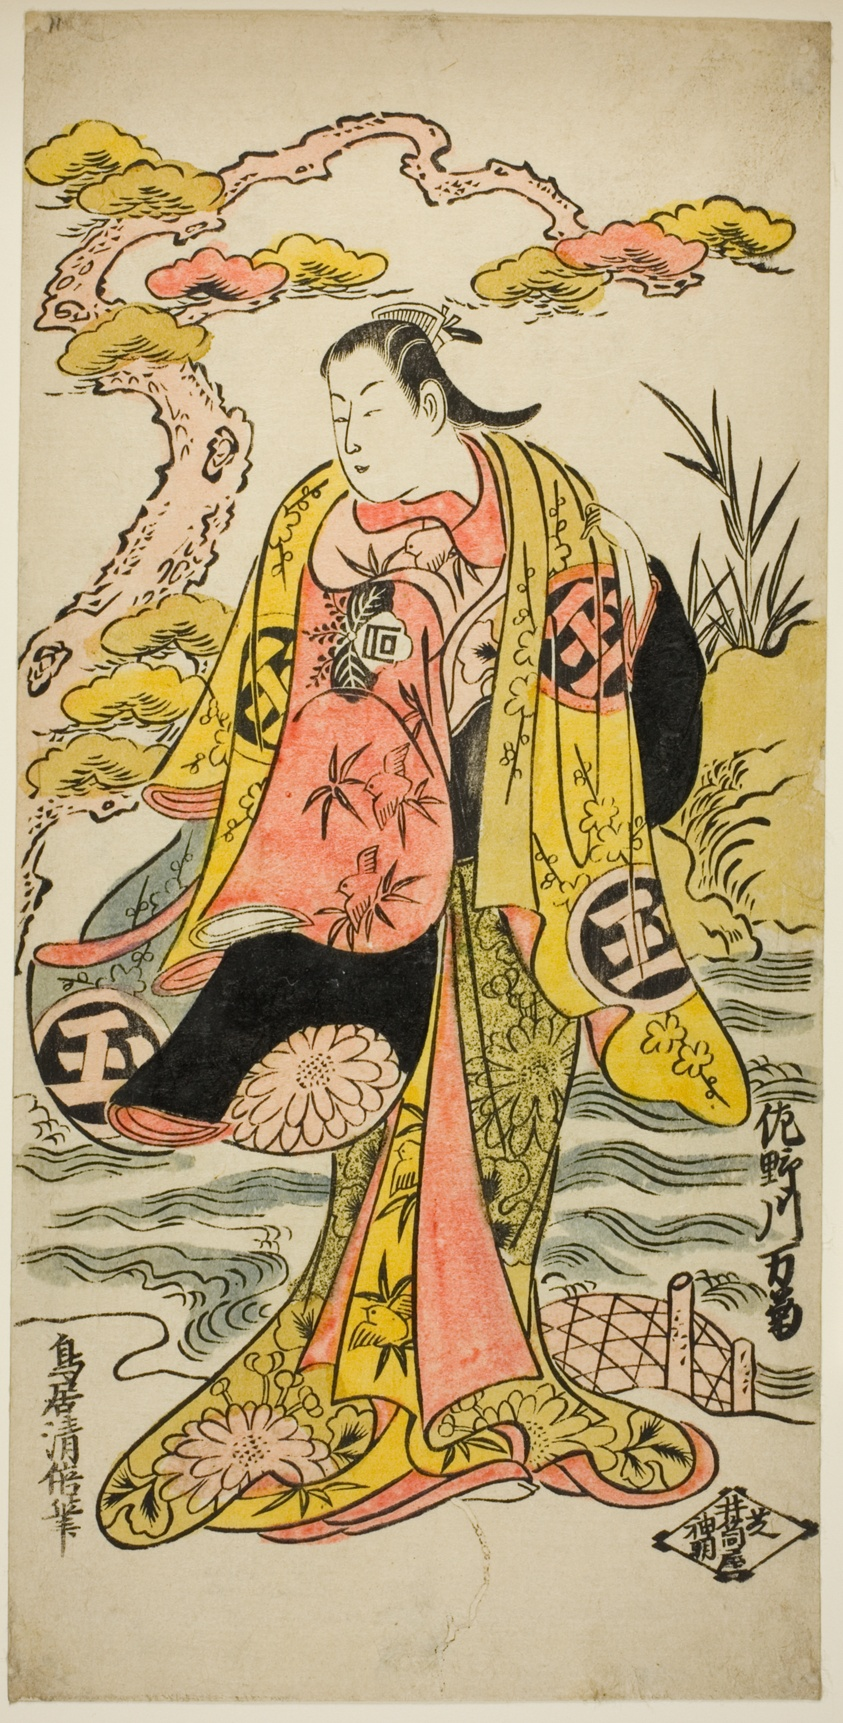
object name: Print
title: The Actor Sanogawa Mangiku I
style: Japanese (culture or style)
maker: Torii Kiyomasu II (Japanese, 1706 (?)–1763 (?))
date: c. 1731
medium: Hand-colored woodblock print; hosoban, urushi-e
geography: Japan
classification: woodblock print; print; asian art